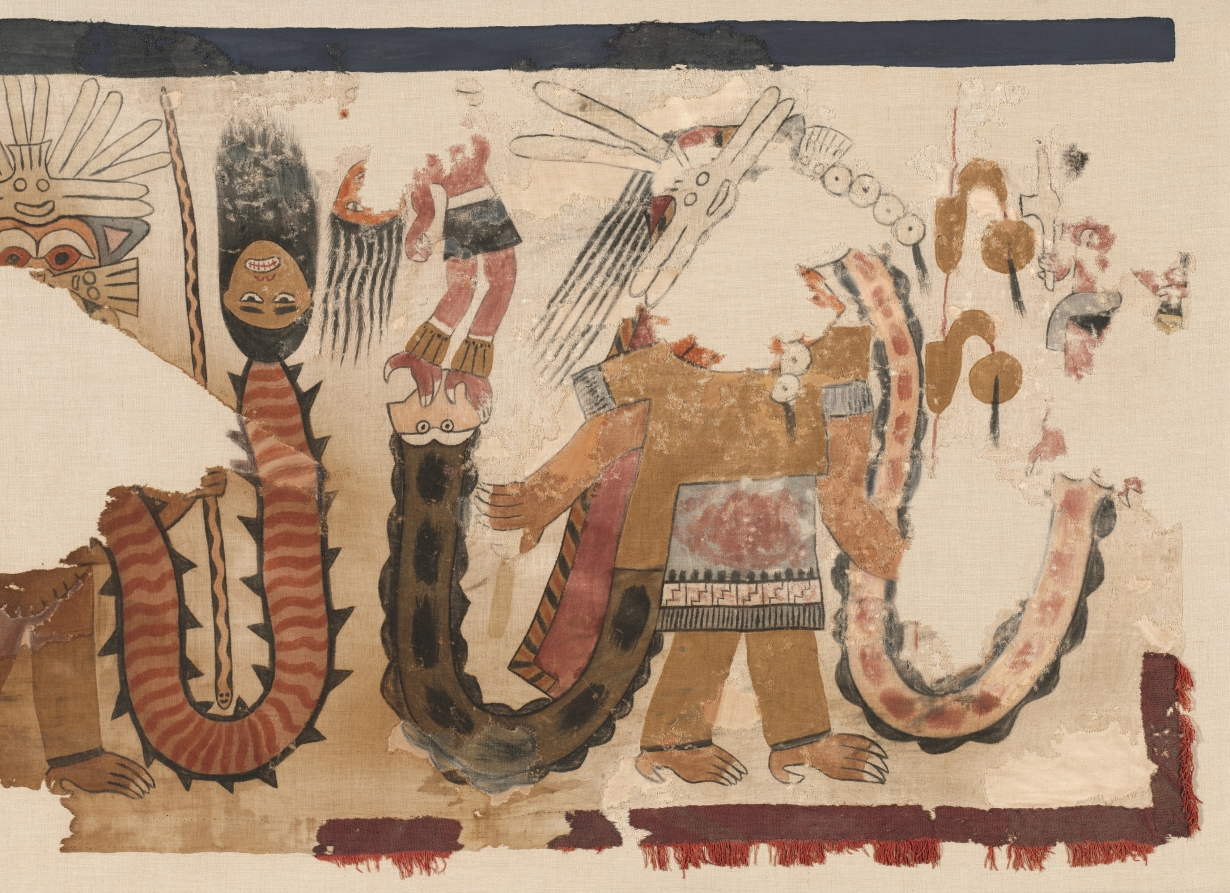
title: Cloth with Procession of Figures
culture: Central Andes, South Coast, Nasca people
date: 170 BCE–70 CE (radiocarbon date, 95% probability)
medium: cotton and pigment (field); camelid fiber (borders and fringe)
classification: Textile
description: Experts agree that this cloth is one of the greatest paintings to survive from Andean antiquity due to the realism, complexity, large size, and refined execution of its figures. All but one of the figures wear the whiskered mouth mask of Nasca supernatural beings and several carry or wear severed human heads, which the Nasca linked to nature’s fruitfulness. Thus, the figures seem to represent supernatural forces or humans personifying such forces during a ritual devoted to agricultural fertility. Originally, the panel was attached along its upper edge to a dark blue cloth of equal size. The complete textile may have served as a mantle (a shawl-like garment), a hanging, or a funerary offering.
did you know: Characteristics of the pampas cat and the emperor tamarin monkey are visible in the marching figures.